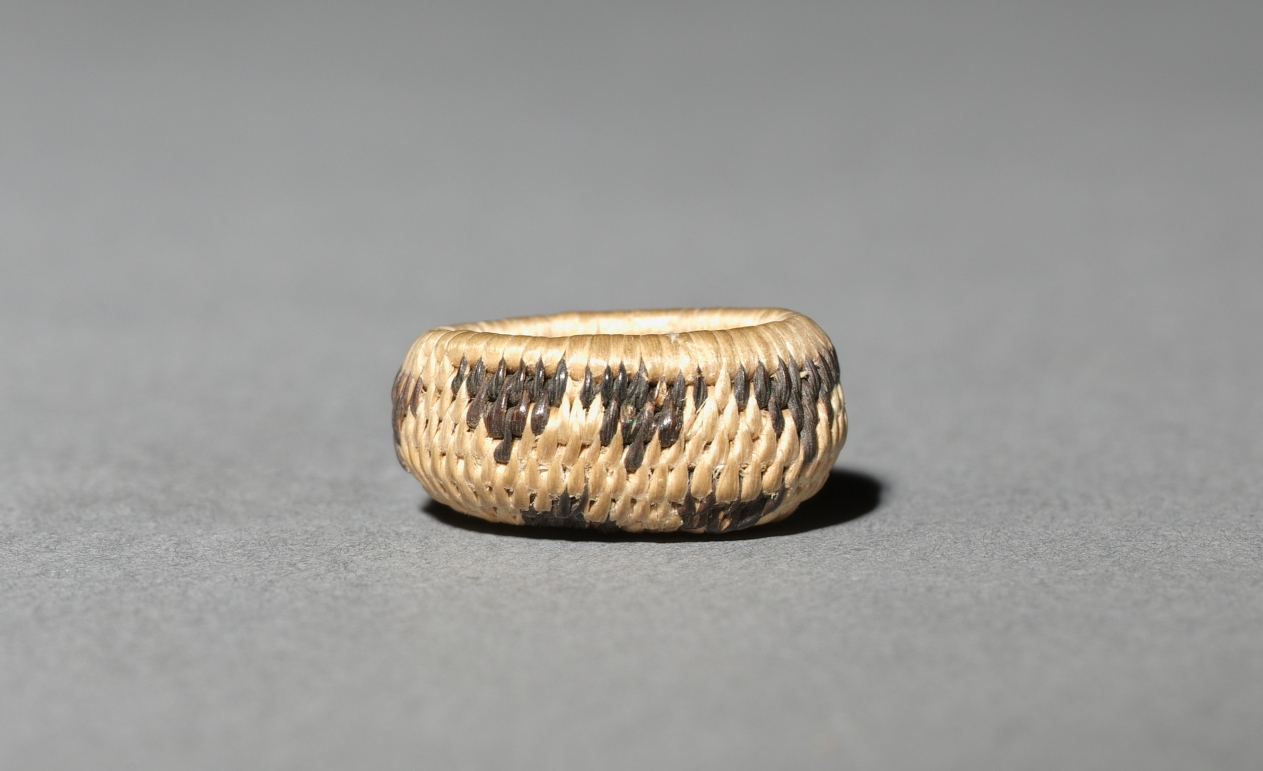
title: Miniature Oval Basket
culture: California, Pomo, 20th century (?)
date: Early 1900s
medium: coiled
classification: Basketry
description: Miniature baskets were made to demonstrate the basket-maker’s virtuoso skill, and these tiny marvels seem to be no exception—the smallest are just a few millimeters wide but still patterned. For such fine work, dexterity was required as much for preparation of materials as for weaving.